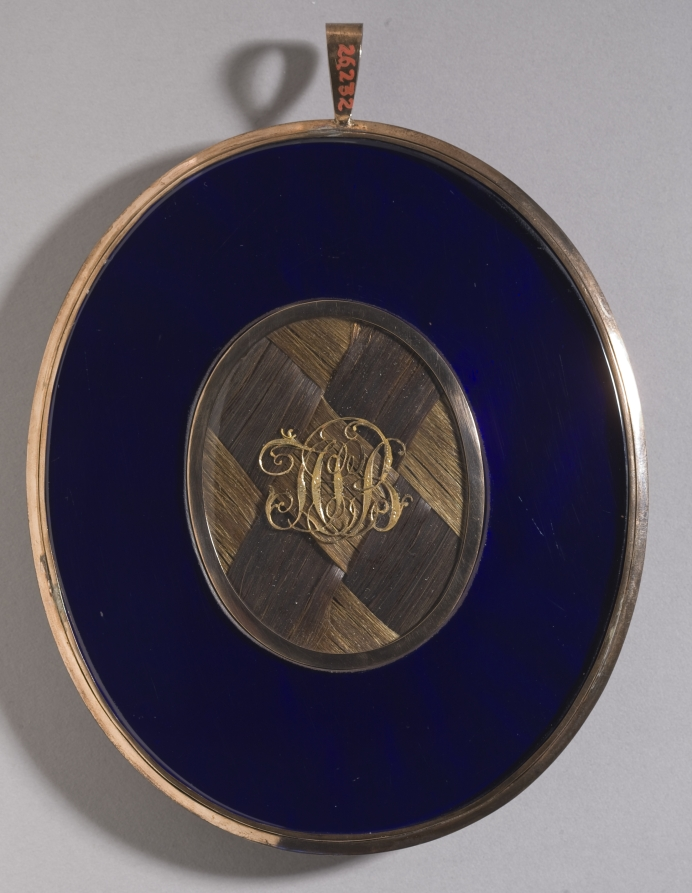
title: Woman with a Tambourine, in Neoclassical Costume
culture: England, 19th century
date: mid to late 19th century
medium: watercolor on ivory in a gold frame with blue glazed reverse and reserve with plaited hair and initials in gold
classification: Portrait Miniature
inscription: annotated lower right: R.C. [initialed on back: JCSB]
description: This large miniature depicts a woman at full length, turned to the left, playing a tambourine held in her left hand. She wears a floor-length, white, Empire-waist gown with short sleeves and scarlet slippers. The Empire silhouette was fashionable in the years around 1800, when it was executed in fine, white cotton or muslin and meant to recall classical Greek or Roman dress. The woman’s light brown hair falls below her waist in curls, and she wears a white turban. She stands on a pale green, closely cropped lawn in front of a low, green, wrought-iron fence with a wood railing. At over 15 centimeters high in its frame, this miniature’s size is incongruous with its oval shape and elaborate glass and braided hair setting, which were typical of late-eighteenth- and early-nineteenth century wearable miniatures a third or quarter of this size. The woman’s face lacks specificity and is probably not a portrait of a particular individual but, rather, a fancy picture exploring themes of beauty and music. This assertion does, however, call into question the presence of the initials and hair on the back of the setting, which customarily indicate an intimate relationship between the owner and the sitter that presumably would be absent outside of portraiture. When this work entered the collection in 1926, it was believed to date from the late eighteenth century, but its size, shape, and the full-length figure make such an early date extremely unlikely. The signature “R. C.” may suggest Richard Cosway (1742–1821), the highly sought-after eighteenth- and nineteenth-century miniaturist; however, this work does not resemble his style. J. H. Wade purchased this object in 1896 for $150—a substantial sum during that period for a miniature—indicating that he may have thought the work was indeed by Cosway. This miniature does relate closely in style and subject matter to the work of the British artist Adam Buck (1759–1833), who was known for his classicizing, full-length watercolor portraits and fancy pictures, after which this work may be a copy. Buck’s miniatures on ivory are bust length and more strongly delineated than this work, which instead recalls the artist’s watercolors. Hallmarks of Buck’s drawings include a low horizon line, muted palette, full-length female figures depicted in profile, and a patchy blue, cloudy sky. A scrolled, wrought-iron fence similar to the one present in this miniature appears in a drawing by Buck. In both cases the fence is used decoratively to break up the expanse of bare space created by the low horizon line and vacant sky. Buck’s works often feature women listening to or playing an instrument, including the tambourine, but he is not known to have painted these full-length figures on ivory. The numerous incompatibilities—including style, subject, composition, medium, setting, size, and signature—together suggest that this object was painted in the second half of the nineteenth century specifically for the art market and to evoke an earlier period.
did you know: On the back the initials JCSB in gold are placed over plaited hair of at least two different colors.